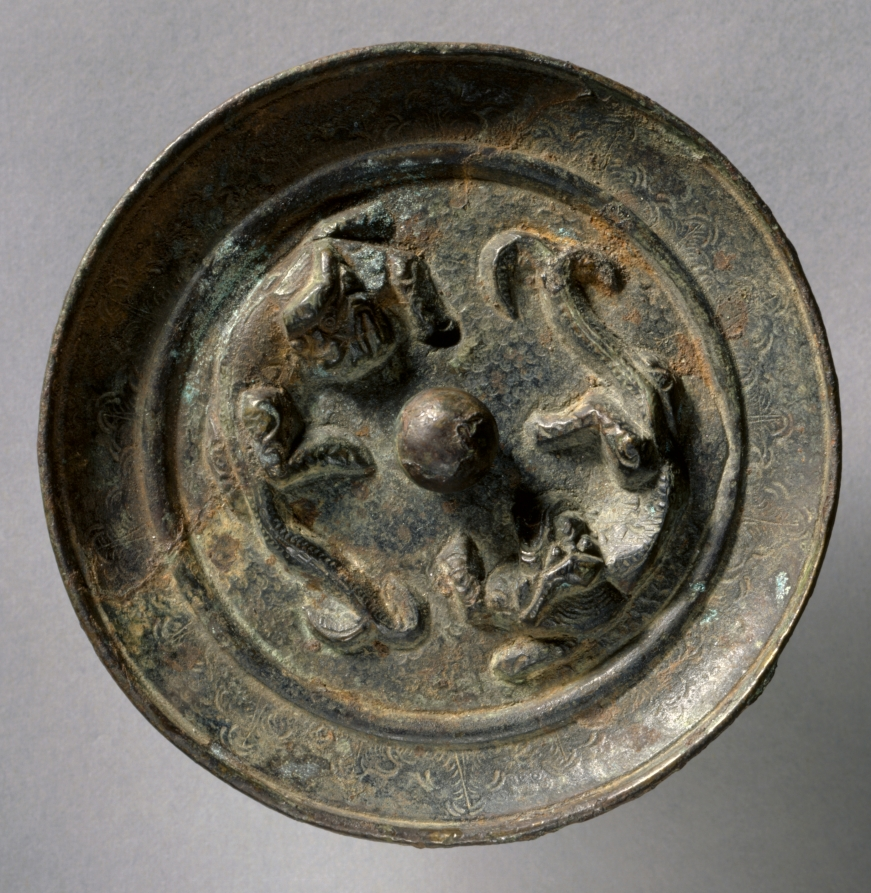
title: Mirror with Dragon Design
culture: China, Qing dynasty (1644-1911)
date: 1700–1911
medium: bronze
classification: Metalwork